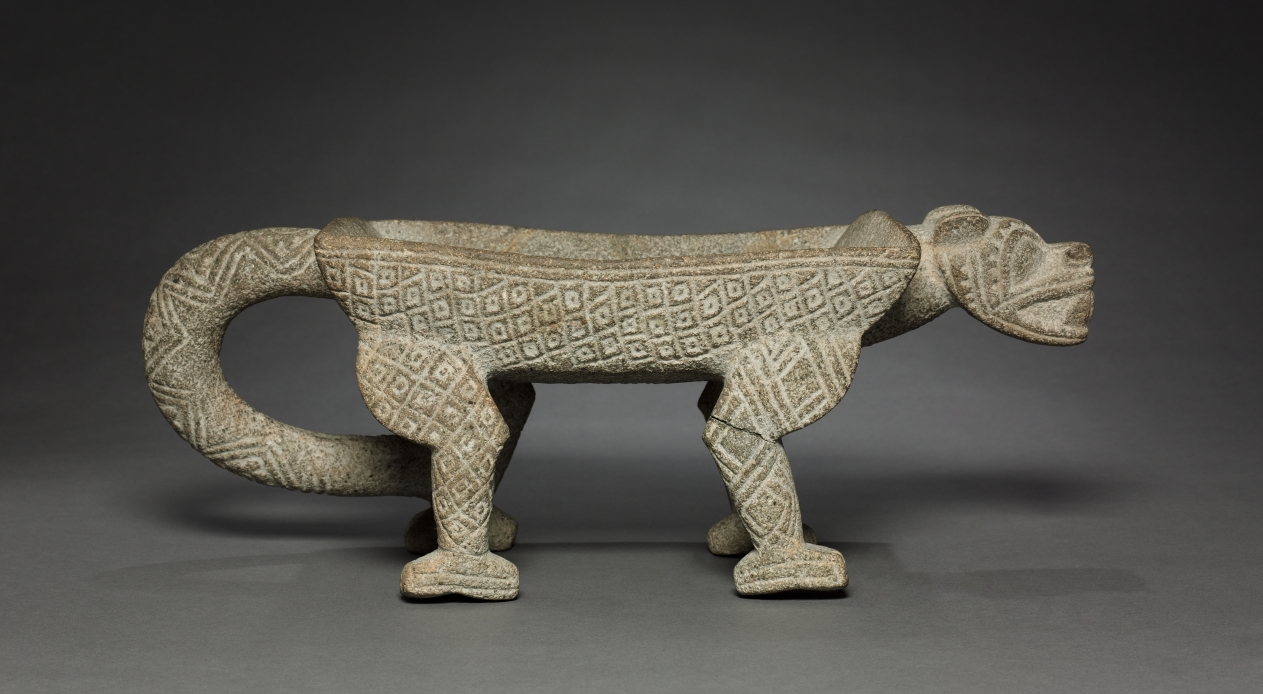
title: Jaguar Grinding Stone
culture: Costa Rica, Atlantic Watershed region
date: c. 1000–1550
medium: stone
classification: Sculpture